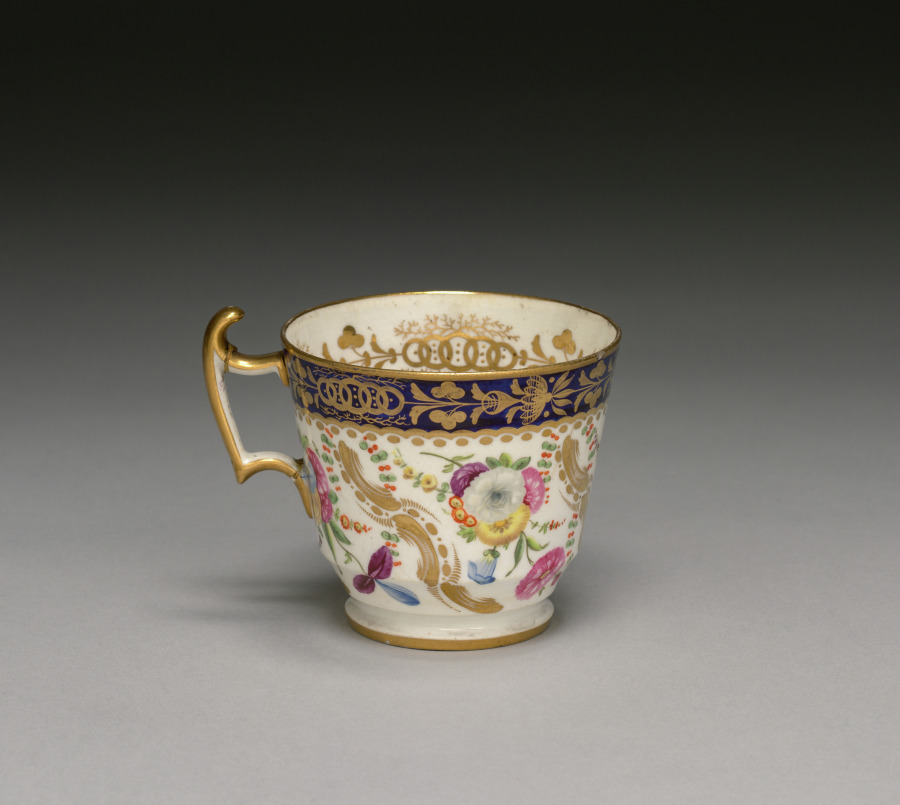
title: Cup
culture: England, Staffordshire, late 18th century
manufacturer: Spode Factory (British)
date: late 1700s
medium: porcelain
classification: Ceramic